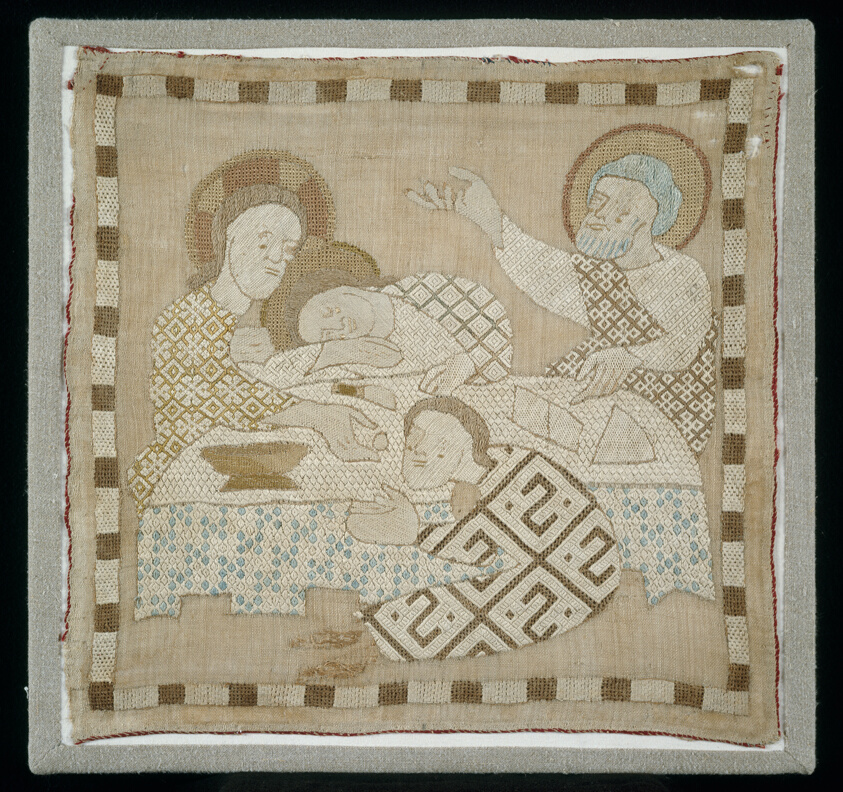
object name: Textile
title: Part of an Antependium (Depicting The Last Supper)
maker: Germany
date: 1300/10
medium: Linen, plain weave; embroidered with linen and silk in pulled thread work in chained border, overcast, and two-sided Italian cross stitches; embroidered in satin, single satin, stem, and stem filling stitches; couching; edged with silk, plain weave tape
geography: Germany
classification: textile; needlework (visual works)